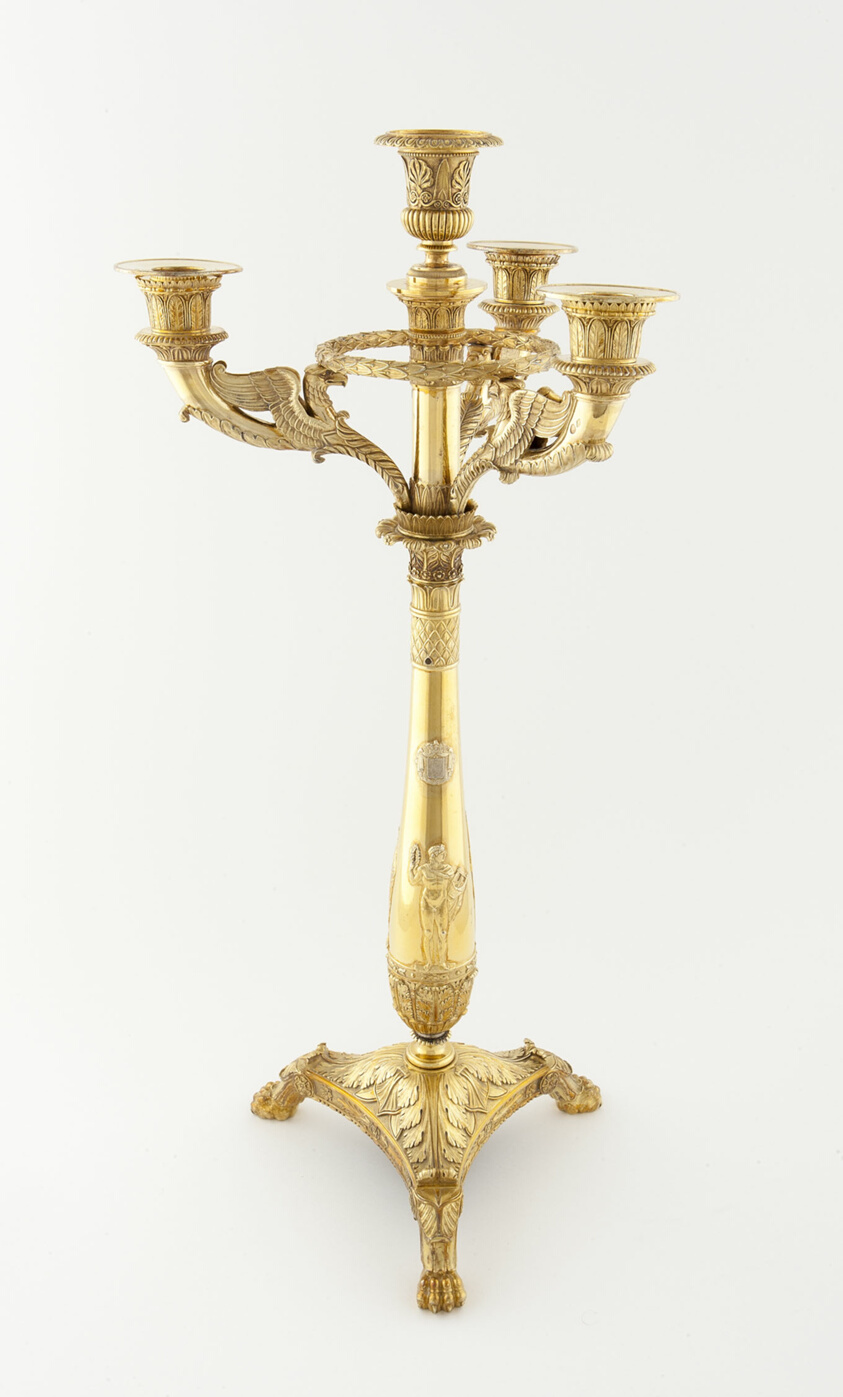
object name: Metalwork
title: Candelabra (one of a pair)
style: napoleonic, empire, Neoclassicism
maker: Martin-Guillaume Biennais (French, 1764-1843); Probably designed after Charles Percier (French, 1764-1838) and; Pierre François Léonard Fontaine (French, 1762-1853); Paris, France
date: c. 1795-1819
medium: Gilt silver and gilt bronze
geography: Paris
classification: candleholder - candelabra; candleholder; silver; metalwork; european decorative arts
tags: Borghese Service, dining, Napoleon